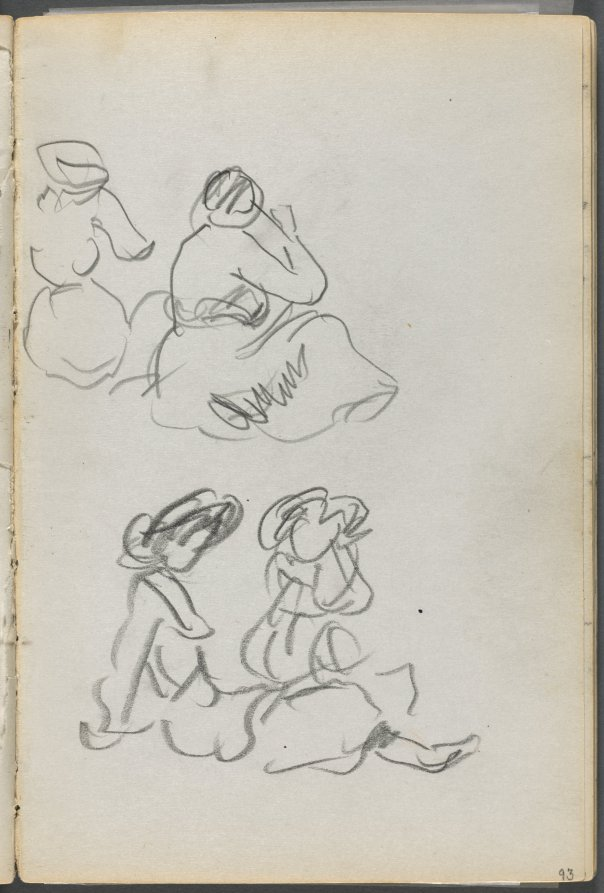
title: Sketchbook, The Dells, N° 127, page 093: Seated Figures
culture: America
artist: Maurice Prendergast (American, born Newfoundland [now Canada], 1858–1924)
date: c. 1919–1921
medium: graphite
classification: Bound Volume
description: This sketchbook contains 59 pages of graphite drawings and 16 watercolors made at various locations on Cape Ann, Massachusetts.